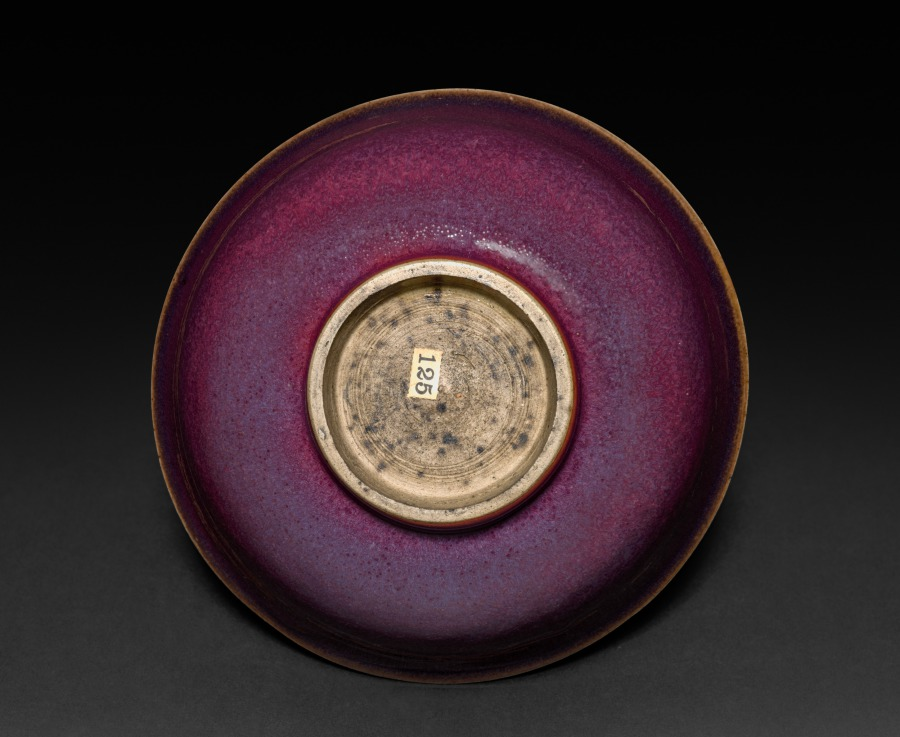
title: Bowl: Jun ware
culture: South China, Yuan dynasty (1271-1368) - Ming dynasty (1368-1644)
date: 14th-15th Century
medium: glazed gray stoneware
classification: Ceramic